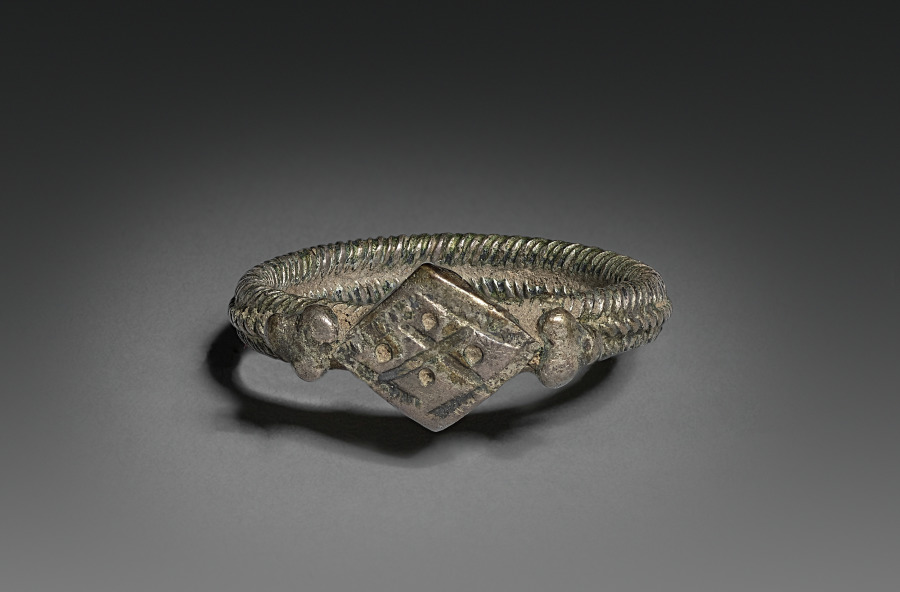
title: Ring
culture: India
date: early 1900s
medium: silver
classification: Jewelry